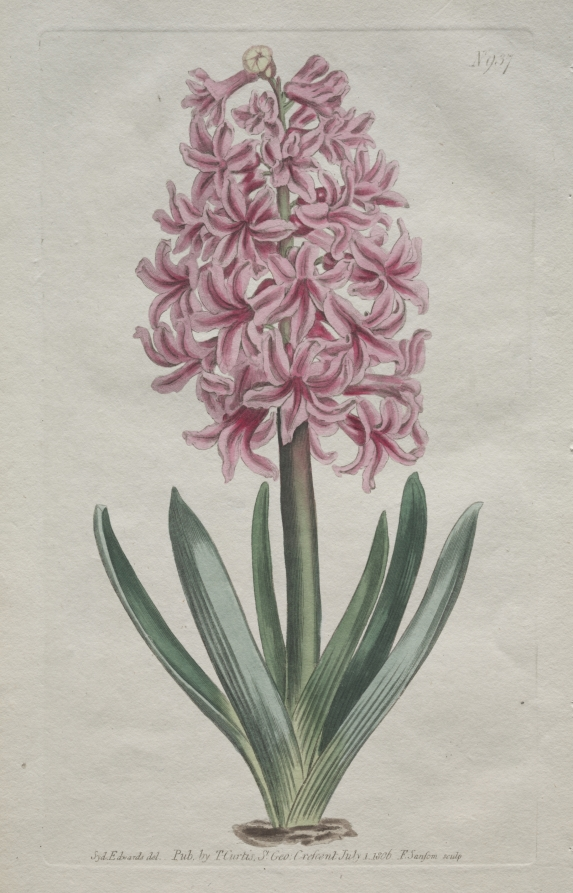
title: The Botanical Magazine or Flower Garden Displayed: Garden Hyacinth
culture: England, 19th century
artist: Thomas Curtis (British, 1846–1920)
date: 1806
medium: engraving, hand-colored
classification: Print